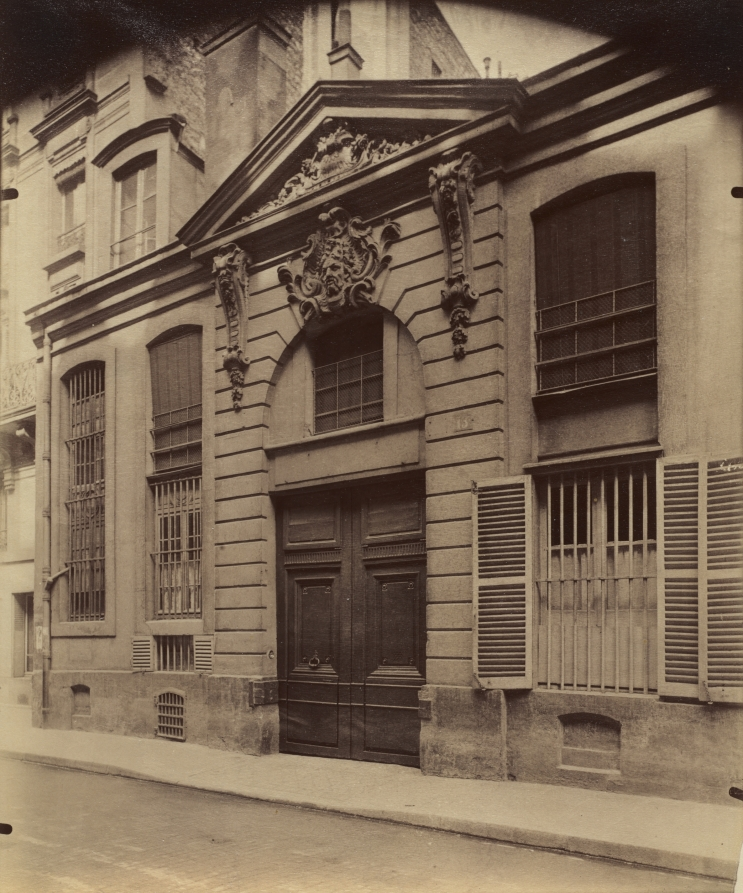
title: Rue du Regard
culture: France, 19th century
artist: Eugène Atget (French, 1857–1927)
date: 1899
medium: albumen print, gold toned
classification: Photograph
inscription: Written in pencil on verso: "Rue du Regard/3664"; "#1000"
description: Despite modernization, many historic sites were left intact including some hôtels particuliers or private mansions. This entrance, which looks similar today, led into the courtyard for the “petit hôtel de Guiche,” built in the 1700s, which adjoined the larger “hôtel de Guiche.” Fragments of those buildings have been incorporated into the modern structures that now occupy the land behind the portal. The houses were named for the de Guiche family, aristocrats that occupied them in the mid- 1700s. Their son was guillotined in 1794 following the French Revolution.